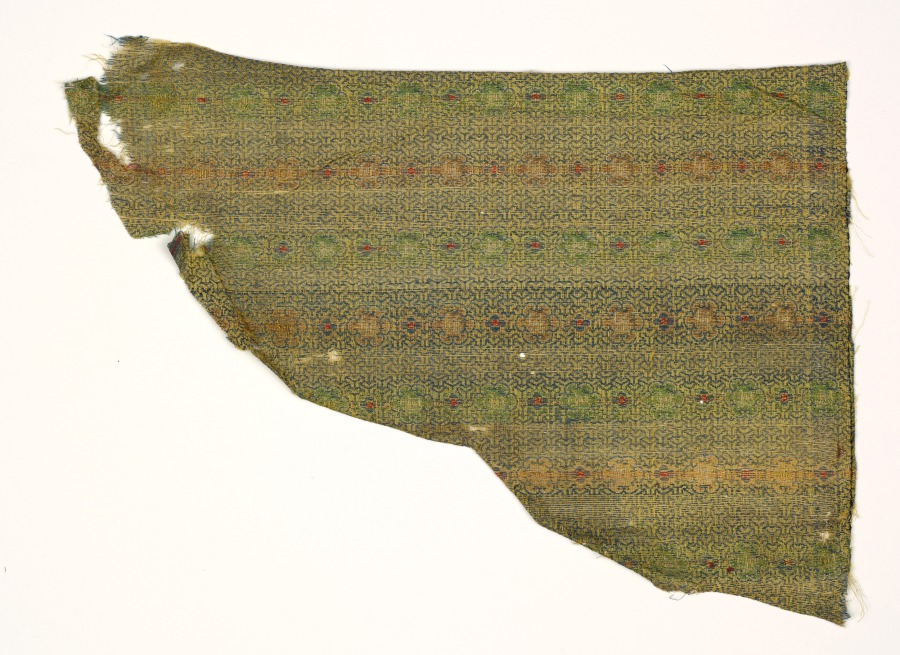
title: Fragment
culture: China, 19th century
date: 1800s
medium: silk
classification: Textile